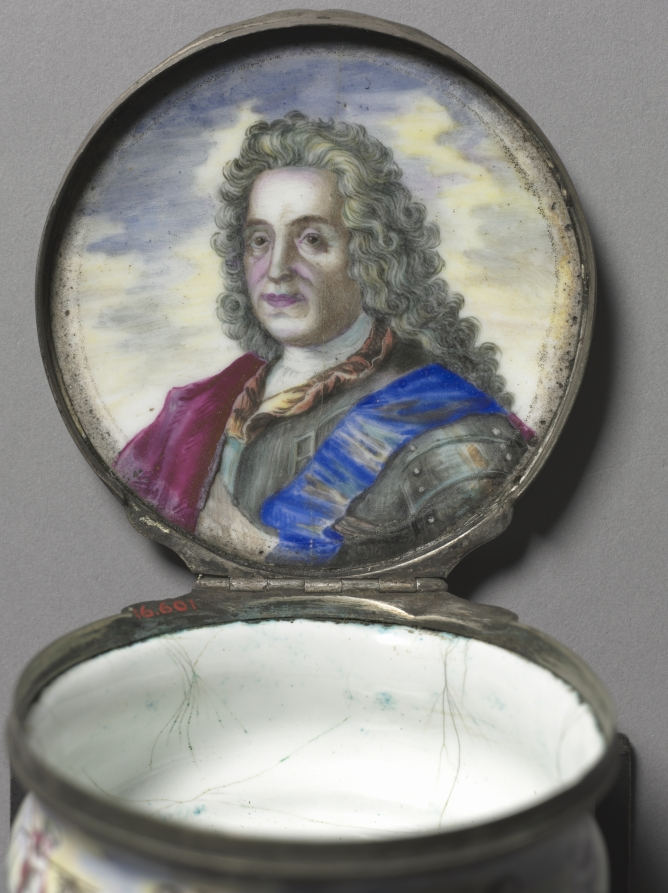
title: Box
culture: Italy or Germany, 18th century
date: 1700s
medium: enamel on copper, metal mounts with traces of gilding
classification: Miscellaneous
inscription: inside box appear the letters "FB" in monogram.